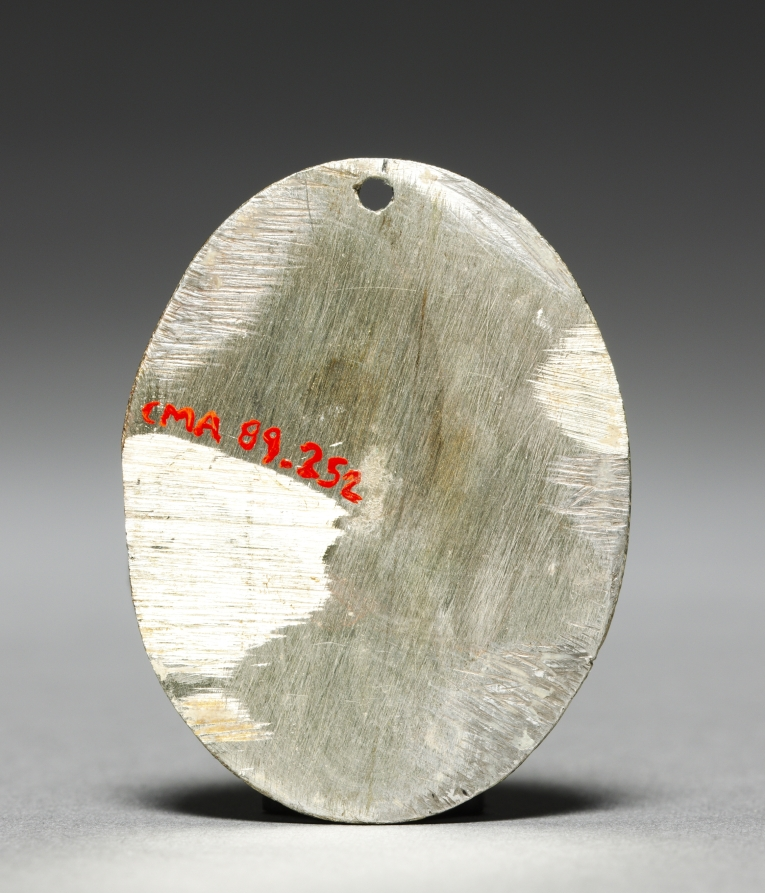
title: The Three Fates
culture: Italy, 16th century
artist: cast after a model by Valerio Belli (Italian, c. 1468–1546)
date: early 1500s or later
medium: silver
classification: Sculpture